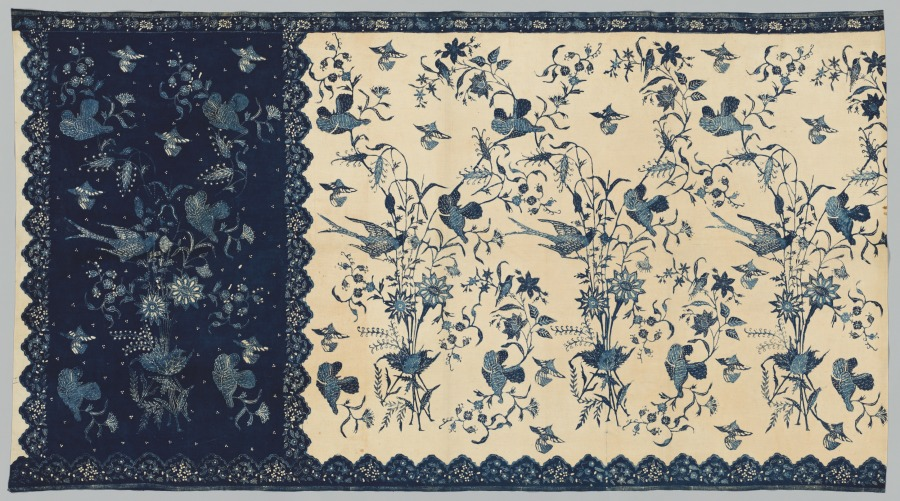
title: Sarong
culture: Indonesia, Java, North Coast, Indramaju ?, early 20th century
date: early 1900s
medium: batik; cotton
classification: Textile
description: Batiks made along the northern coast of Java were influenced not only by Chinese motifs and designs but also European, as a result of the Dutch presence in Indonesia from the sixteenth to the twentieth centuries. In this sarong, European influence is clearly evident in the sprays of flowers and types of birds represented. Batiks dyed only in indigo were a specialty of Indramaju. Shading and contrast are skillfully achieved through different intensities of blue, through the character and thickness of line, and by the use of tiny dots.